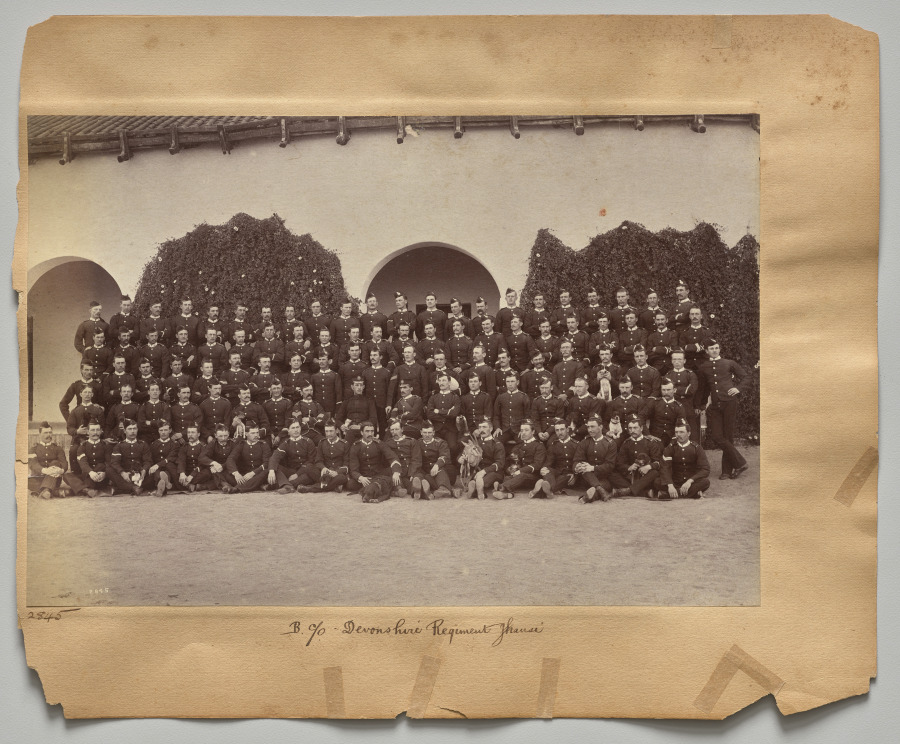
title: B. c/o Devonshire Regiment, Jhansi (recto)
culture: India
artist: Raja Deen Dayal (Indian, 1844–1905)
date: c. 1882–87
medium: albumen print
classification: Photograph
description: These photographs are part of an album, now disassembled, of around 105 photographs taken in India between 1885 and summer 1887 that provide glimpses into the lives of the British colonial elite and royal and upper-class Indians. The museum holds another group of 37 pictures from this album (2016.266), which was probably commissioned by a British civil servant visiting or working in India around 1888 as a personal souvenir of his experiences there.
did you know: Raja Deen Dayal is regarded now, and was considered during his lifetime, to be India’s most important 19th-century photographer.